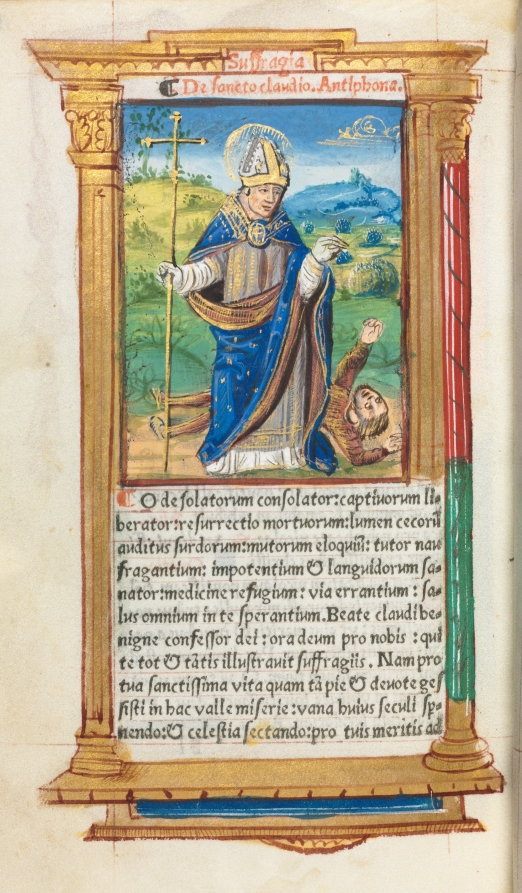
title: Printed Book of Hours (Use of Rome): fol. 105v, St. Claude as Bishop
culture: France, Paris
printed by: Guillaume Le Rouge (French, Paris, active 1493–1517)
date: 1510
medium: 112 Printed folios on parchment, bound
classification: Bound Volume